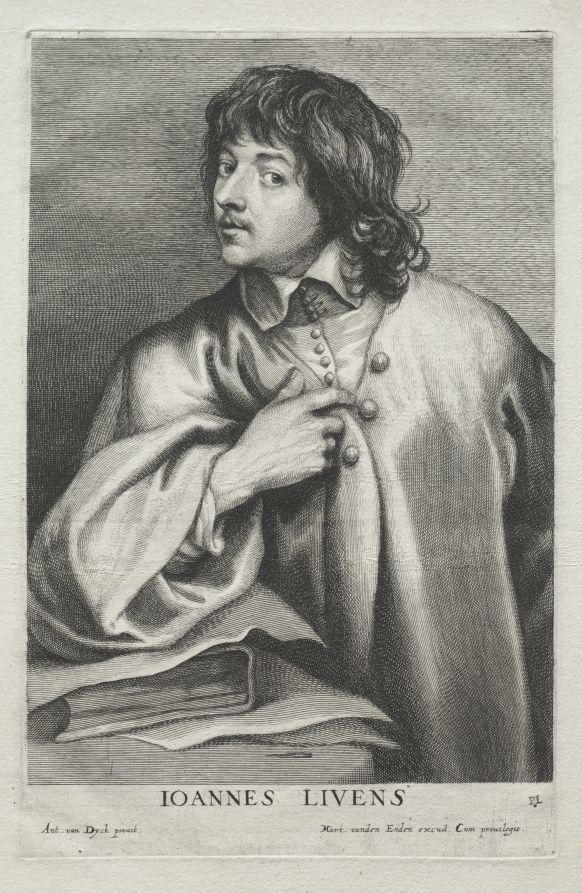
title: Jan Lievens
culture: Flanders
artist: Lucas Emil Vorsterman (Flemish, 1595–1675)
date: 1636–41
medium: etching and engraving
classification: Print